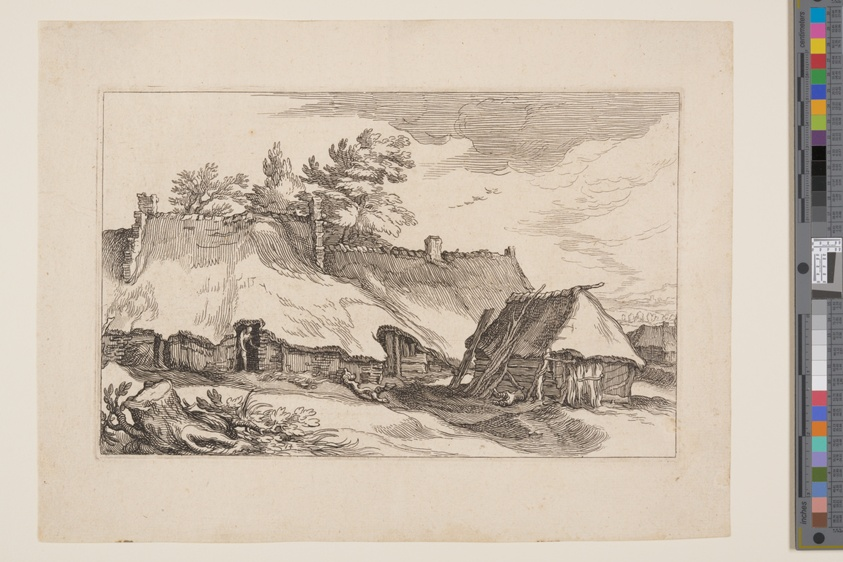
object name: Print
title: Plate 14, from Landscapes with Farmhouses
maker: Boëtius Adamsz. Bolswert (Flemish, 1580–1633); after Abraham Bloemaert (Dutch, 1566–1651)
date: 1614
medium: Etching on ivory laid paper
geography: Flanders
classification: print; paper; prints and drawing; etching